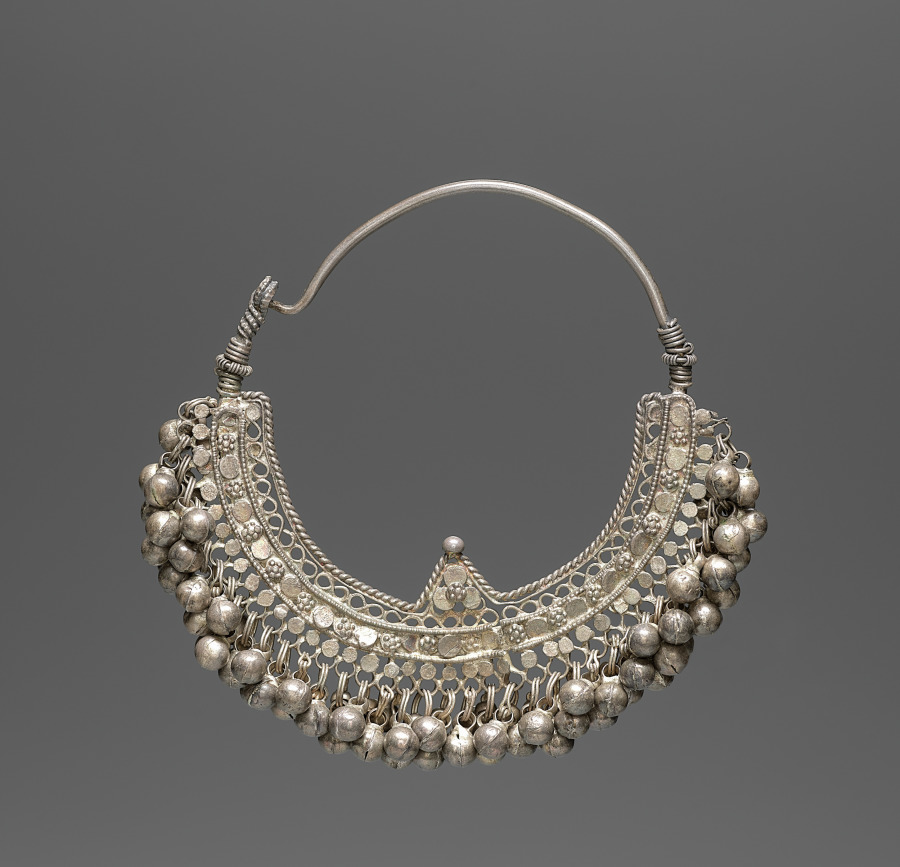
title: Nose Ring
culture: India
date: early 1900s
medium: silver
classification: Jewelry